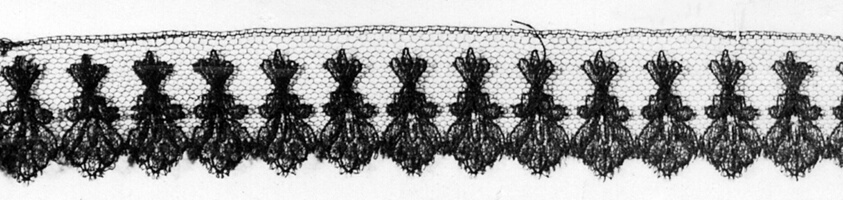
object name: Textile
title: Two Borders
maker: England or France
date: 1875/1900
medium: Silk, Pusher machine lace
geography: England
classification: textile; lace - machine